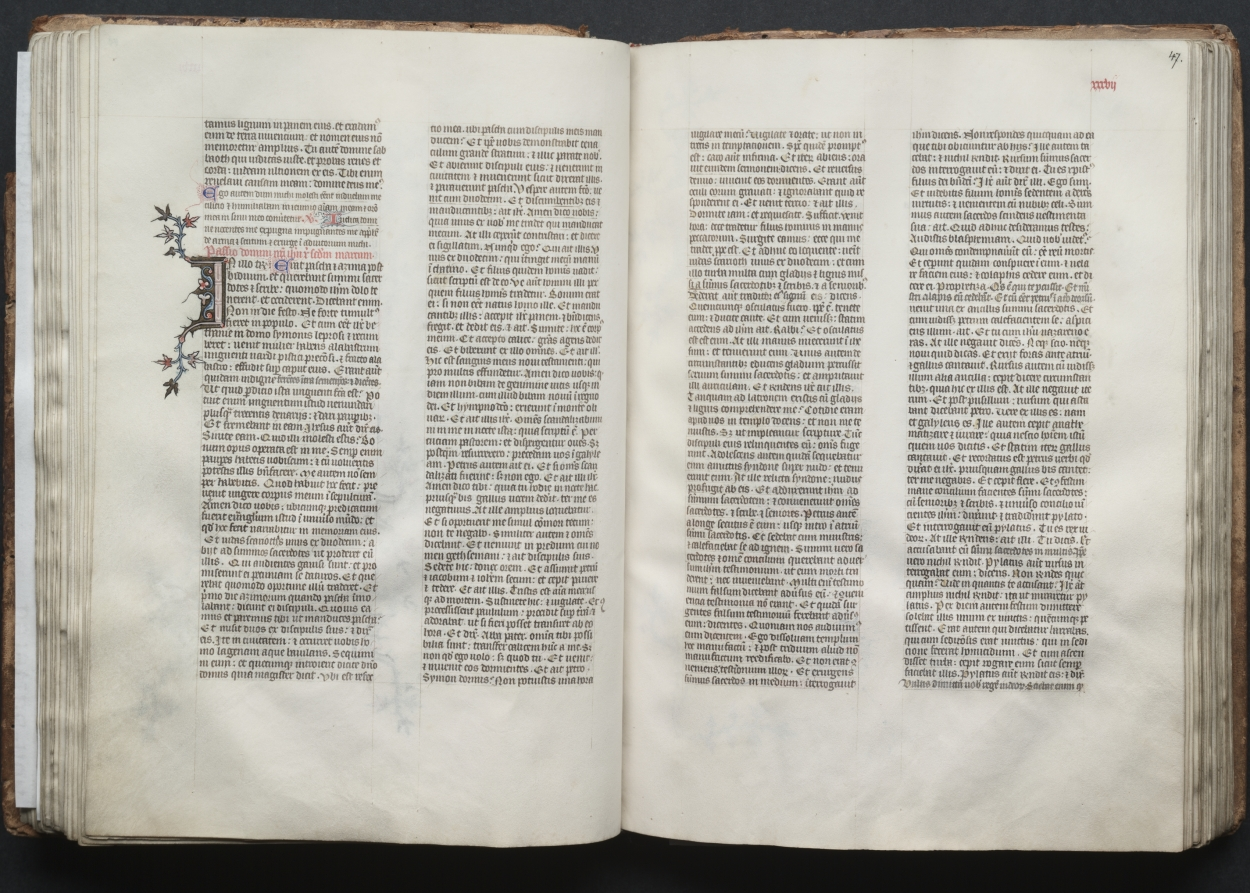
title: The Gotha Missal: Fol. 46v, Text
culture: France, Paris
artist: Master of the Boqueteaux (French)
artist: and Workshop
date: c. 1375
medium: ink, tempera, and gold on vellum; blind-tooled leather binding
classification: Bound Volume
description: The style and quality of this manuscript's decoration is typical of deluxe Parisian books made for aristocratic or royal patrons. Most of the book's decoration appears to be the work of the Master of the Boqueteaux, an artist active at the court of King Charles V (died 1380). His style was apparently shared by a number of book illuminators working in and around Paris. It is very possible that the Gotha Missal belonged to Charles V, but is not provable because the manuscript has no royal portraits and lacks a colophon. Given the book's magnificent decoration, however, it would seem that it was produced for a Valois prince, if not for the king himself. The manuscript receives its name from the German dukes of Gotha, its later owners.